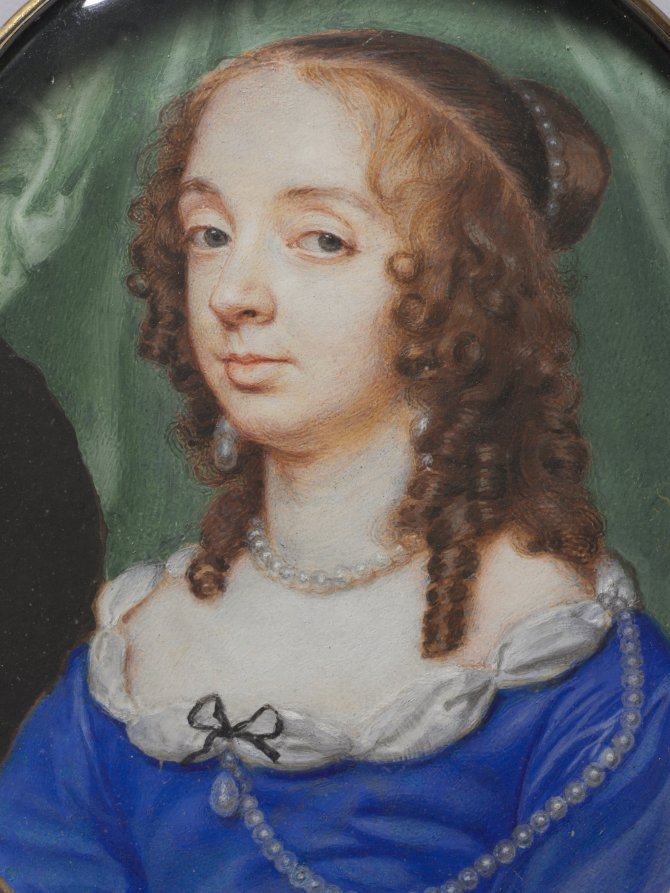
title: Portrait of a Woman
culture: England, 17th century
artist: Samuel Cooper (British, 1608/09–1672)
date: 1646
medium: watercolor on vellum with gold border in a silver gilt frame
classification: Portrait Miniature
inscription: signed right: S.C. / 1646.